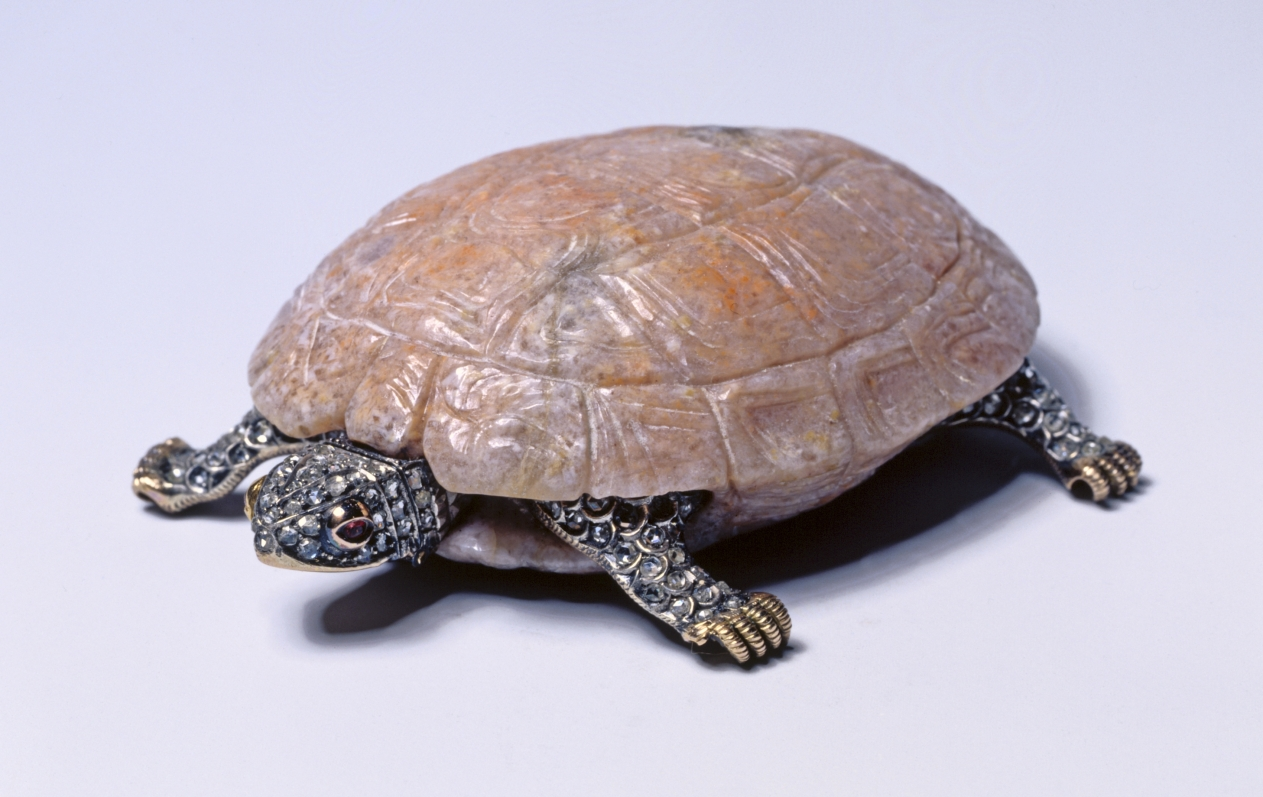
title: Turtle Bell Push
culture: Russia, St. Petersburg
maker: House of Fabergé (Russian, 1842–1918)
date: c. 1895–1915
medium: agate, gold, silver, diamonds, rubies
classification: Miscellaneous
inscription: 7434 scratched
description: In creating luxurious accessories for a desk or tabletop, Fabergé often used native hardstones such as multicolored agate and jasper, green nephrite, pink rhodonite, and rock crystal found in the Ural Mountains of western Russia. By paying careful attention to the unique colors and textures of the stones, Fabergé and his craftsmen brought them to life, turning milky agate into this turtle bell push or black jasper into sleeping puppies. The use of native materials also promoted Russian nationalism, which appealed greatly to the tsar and his family.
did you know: To summon the butler, a quick push on the turtle's head would ring the bell downstairs.